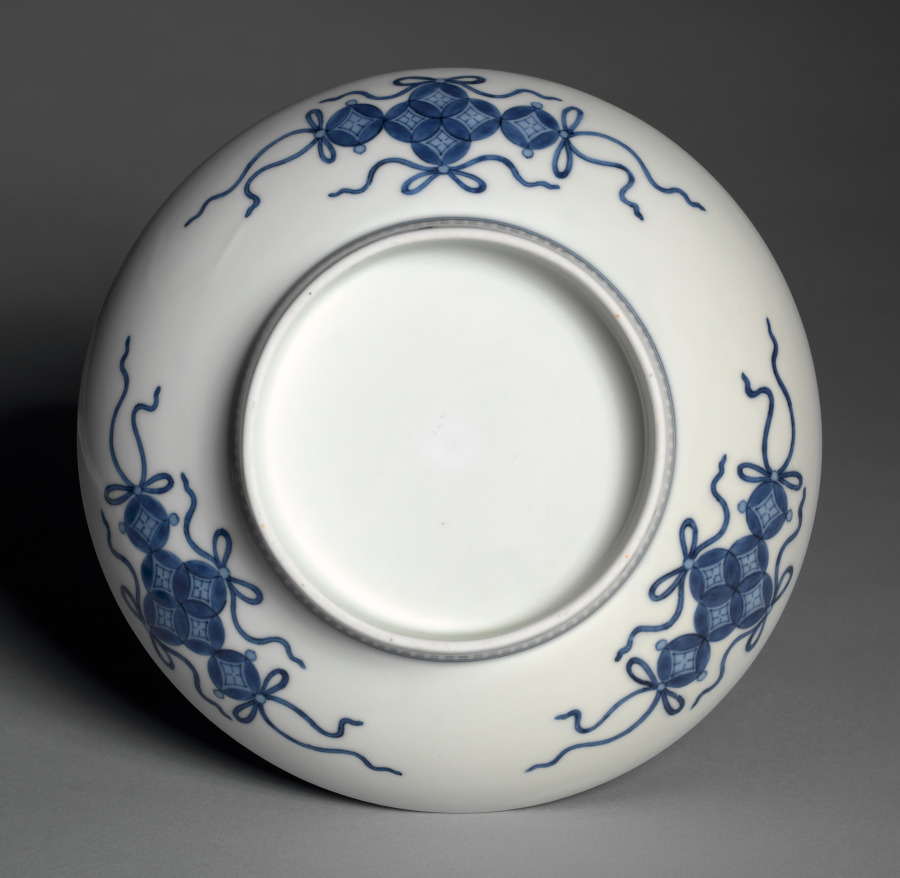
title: Dish with Ginkgo Leaves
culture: Japan, Edo period (1615–1868)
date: late 1600s–early 1700s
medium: Porcelain with underglaze blue (Hizen ware, Nabeshima type)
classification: Ceramic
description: This dish is an example of the finest type of Japanese porcelain, Nabeshima-type Hizen ware. It has a complex, abstracted design of ginkgo leaves and “Chinese grasses” (karakusa) in underglaze blue that may be among the most interesting of the underglaze blue designs. The dish is the largest of the three standard-sized Nabeshima dishes for individual servings.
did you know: The ginkgo's distinctive fan-shaped leaf is a symbol of longevity and endurance in Japanese art.